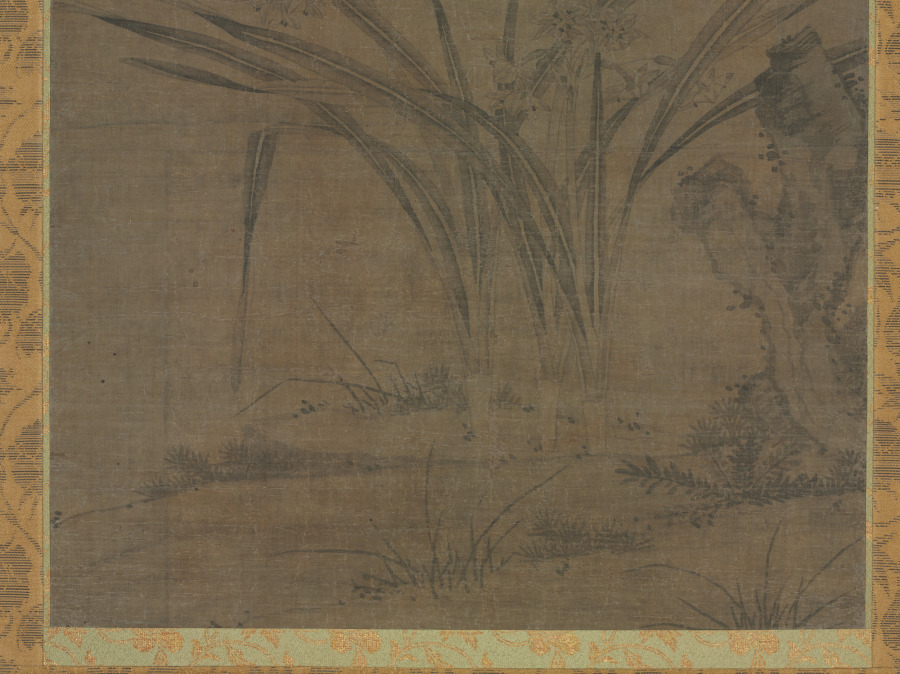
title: Narcissus and Rocks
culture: China, Ming dynasty (1368–1644)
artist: Lu Tianru (Chinese, first half of 1400s)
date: 1368–1644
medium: hanging scroll, ink on silk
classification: Painting